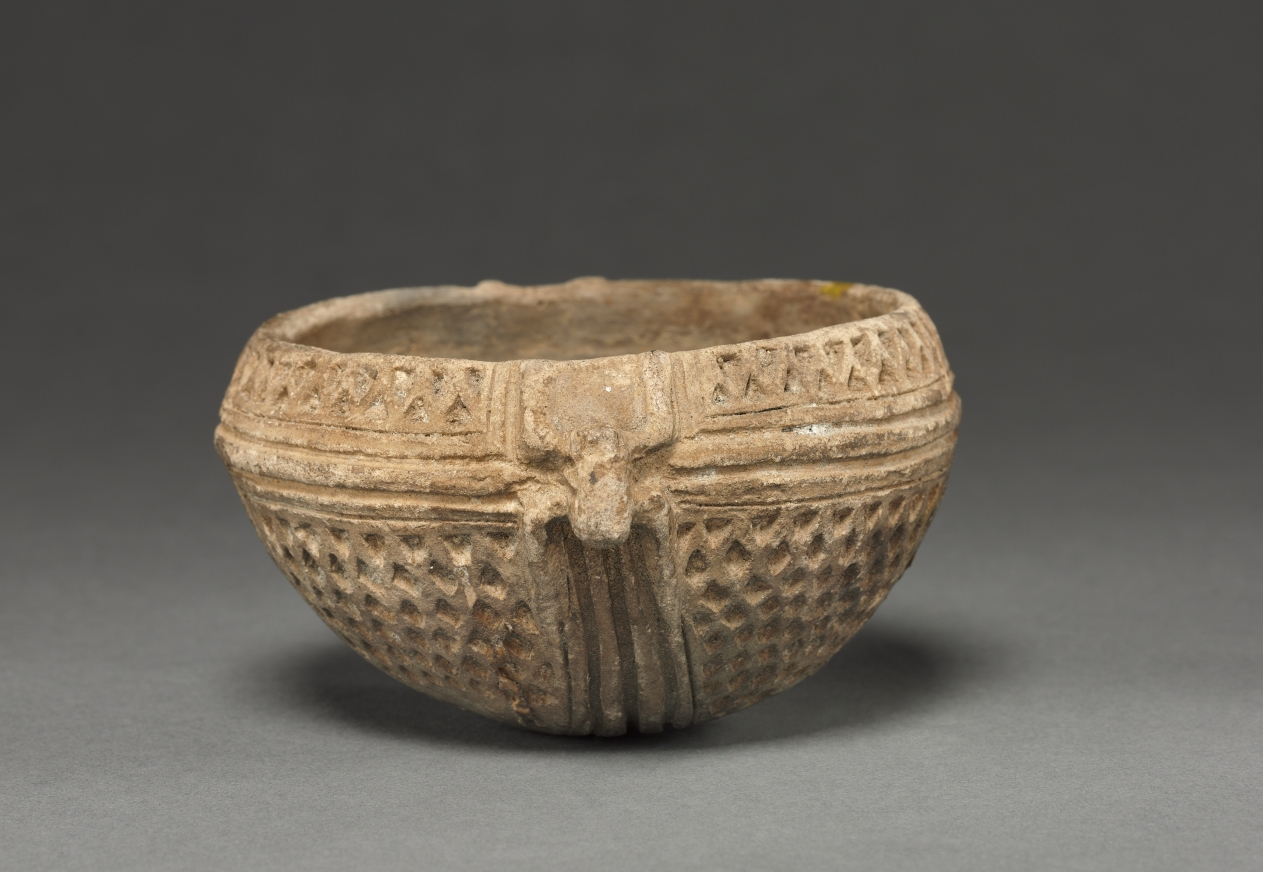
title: Jar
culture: Colombia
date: before 1550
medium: red ware with incised patterns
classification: Ceramic